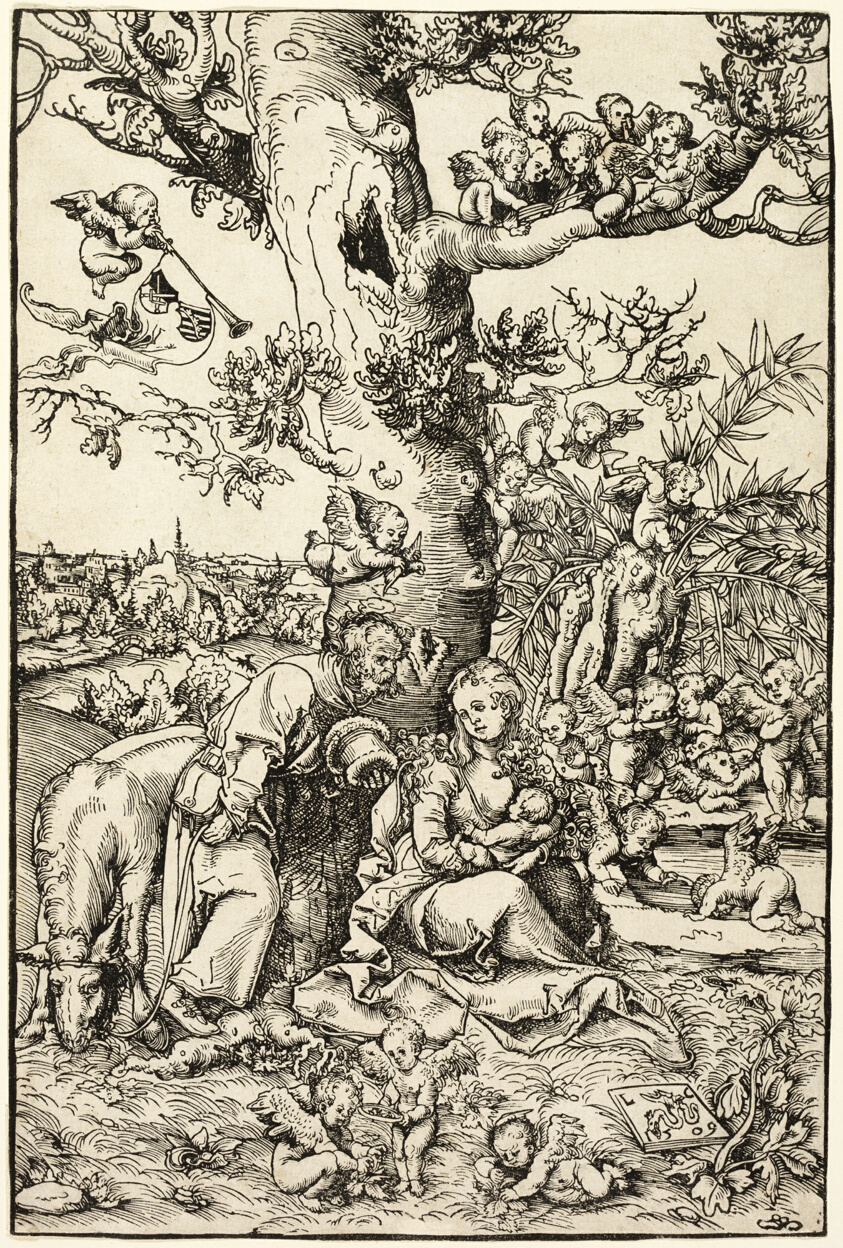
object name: Print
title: The Rest on the Flight into Egypt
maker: Lucas Cranach the Elder (German, 1472-1553)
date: 1509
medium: Woodcut in black on ivory laid paper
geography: Germany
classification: woodcut; print; prints and drawing